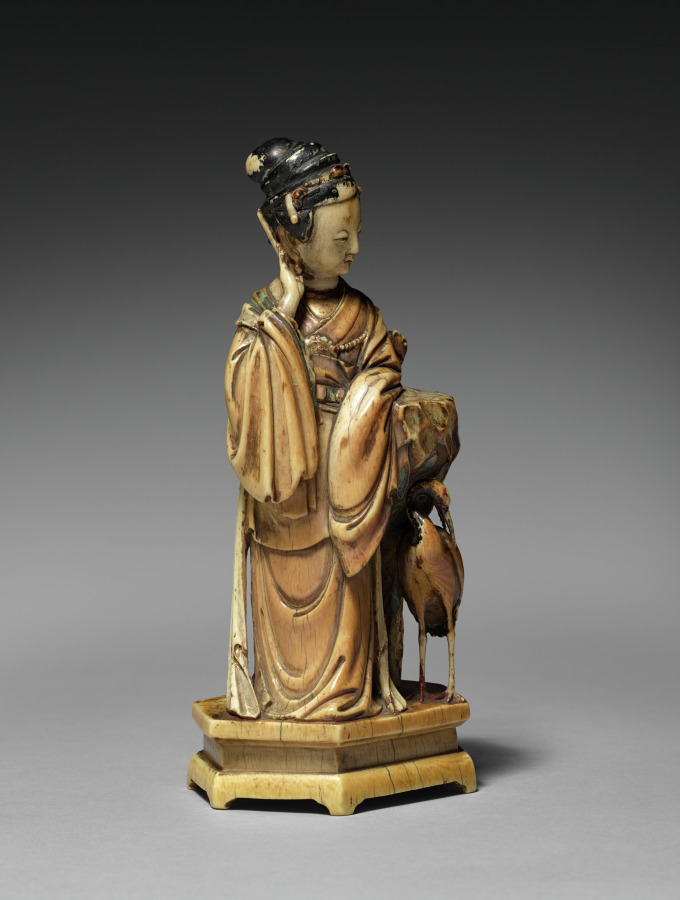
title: Female Figure with Crane and Squirrel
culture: China, Qing dynasty (1644-1911), Kangxi reign (1662-1722)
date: 1662–1722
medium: ivory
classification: Ivory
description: In the Qing dynasty (1644–1911), luxury items became more affordable to larger parts of the society, including women, merchants, and literati in non-official positions. Imperial patronage and a growing urban population encouraged consumption of luxury goods and local craftmanship. This ivory form of a woman with a crane illustrates the superb skills and the creative mind of the talented artisan who sought clients on a competitive market.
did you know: The ivory has aged to a rich amber, while traces of its original red and green paint remain on the woman’s cuffs and collar.